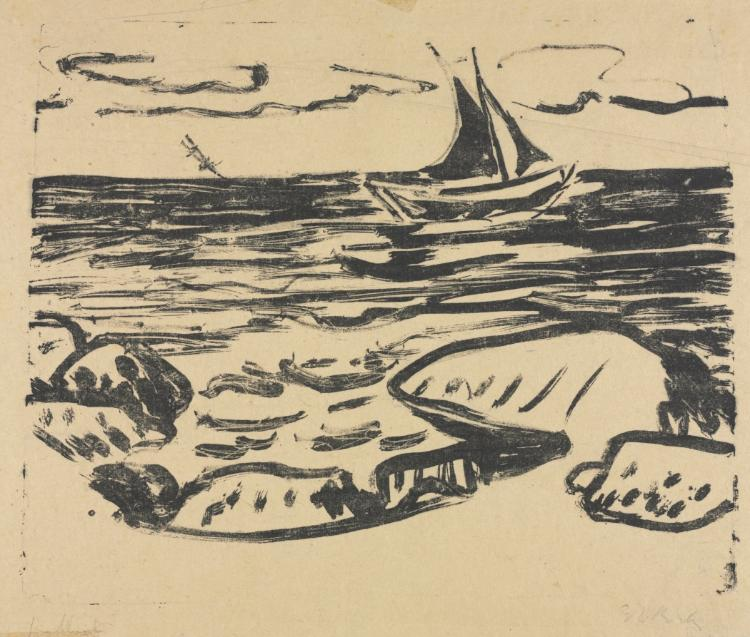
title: The Sea near Staberhuk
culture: Germany, 20th century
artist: Ernst Ludwig Kirchner (German, 1880–1938)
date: 1908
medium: lithograph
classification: Print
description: Ernst Ludwig Kirchner made this print during the first year that he learned the lithographic process. In contrast to convention, he wished to make it immediately apparent that a lithograph was not a drawing. To do so, he used lithographic wash to draw right to the edges of the stone, abruptly cutting off the composition and emphasizing the stone’s irregular contour with inked edges. The spontaneity of the quickly drawn marks that mimic the weather and wind of the sea, coupled with the emphasis on the materiality of the stone, matched Kirchner’s quest for truth in his art.